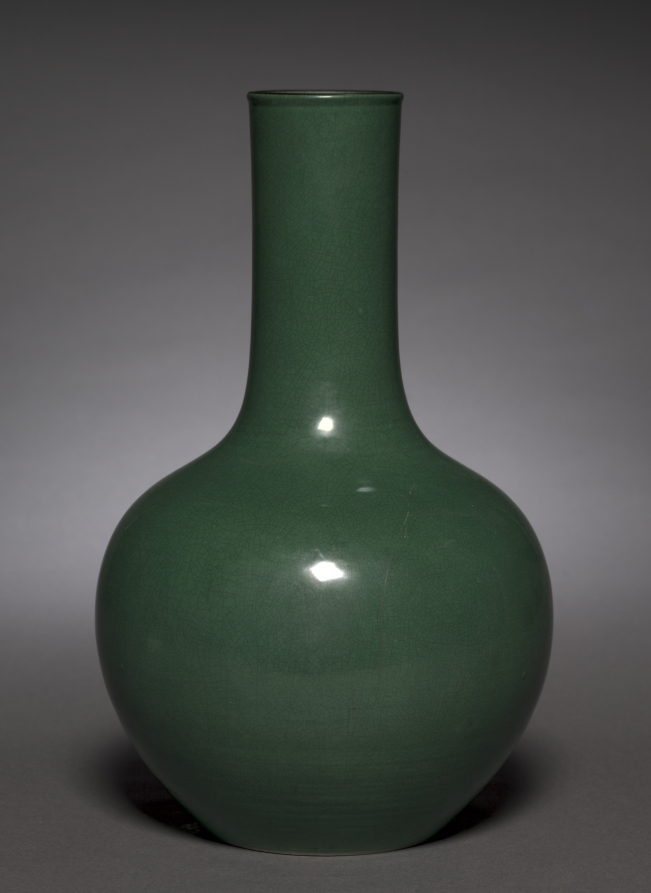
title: Bottle-shaped Vase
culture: China, Qing dynasty (1644–1911), Qianlong reign (1736–95)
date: 1736–95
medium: porcelain with green glaze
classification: Ceramic